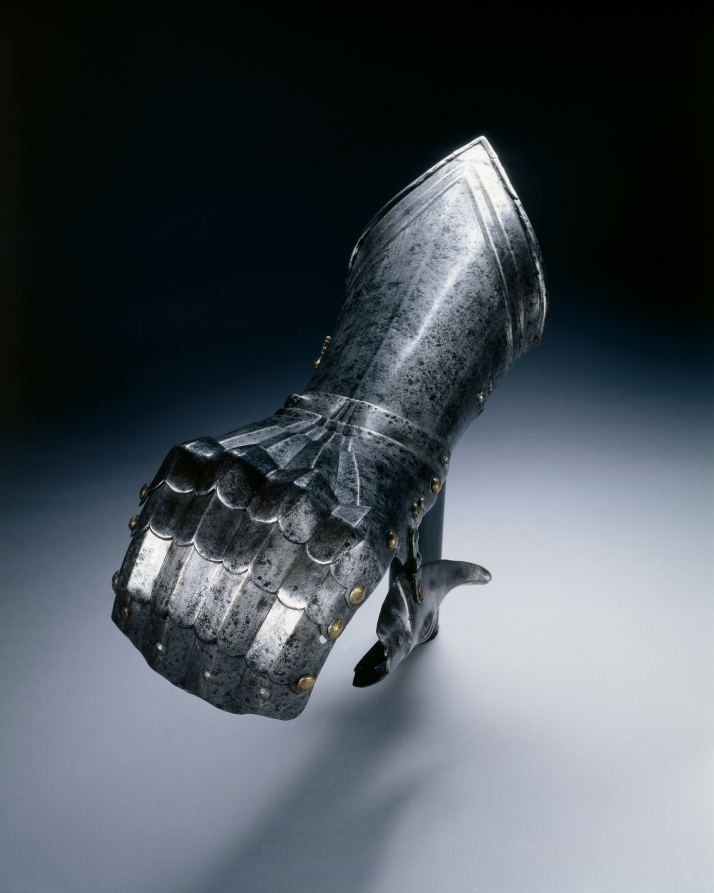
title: Gothic Mitten Gauntlet for the Right Hand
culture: South Germany or Austria (Innsbruck), late 15th Century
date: c. 1490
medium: steel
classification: Arms and Armor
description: The forging of steel, a very hard material, into precisely fitted, interconnected plates was a task that required great skill and patience. The elements of a suit were never riveted directly together which would make them inflexible. Instead they slightly overlapped and were attached by different types of rivets.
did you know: Embossed decoration adds beauty to this gauntlet that would have protected the hand.